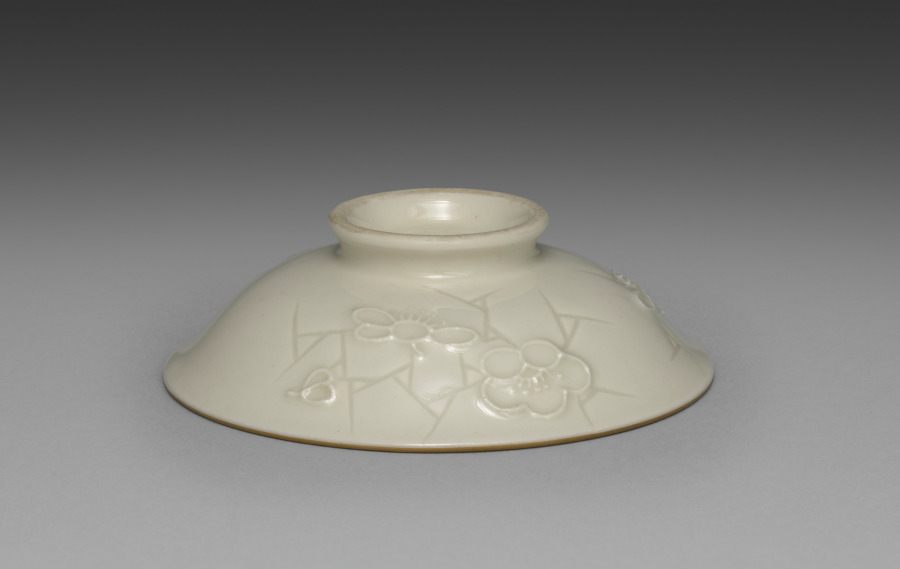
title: Cover for a Bowl from Dining Set with Plum Blossoms and Cracked-Ice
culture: Japan, Meiji period (1868–1912)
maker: Seifū Yohei II (Japanese, 1844–1878)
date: c. 1875–78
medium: Porcelain with molded designs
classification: Ceramic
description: Each item in this set has a delicate low-relief design of flowering plum branches over scattered, intersecting lines meant to resemble the cracked-ice surface of a frozen body of water and is signed on the base in gold pigment. While Yohei II produced many fine works in underglaze blue, like those produced by Kiyomizu Shichibei, he also made works in quite different styles later in his career, from the early 1870 s. In 1873, he was appointed purveyor to the Industrial Center of Kyoto Prefecture, a designation associated with Kyoto’s efforts to reach an international market through the port of Kobe; and from 1875 until his death, he was involved in national-level projects to present Japanese ceramics across the world. It was during this period that Yohei III was apprenticed to Yohei II, and it has been suggested that this set may in fact be an early example of Yohei III’s work, which he signed with his teacher’s name. Decorated with flowers resembling Japanese textile motifs, the set calls to mind the design of Yohei II’s pair of vases with plum blossoms in the Victoria and Albert Museum. Here, the elaborate trees created for a formal public exhibition setting have been translated into the approachable blossoms of the genteel domestic environment. While the designs are consistent across the pieces, each raised flower petal and pistil and each incised line in the ice was done by hand, so the cups, bowls, and dishes are similar yet unique. The bottoms of two boxes once identified the set’s owner, but the information has been deliberately obscured with black ink. However, inscriptions still visible appear to indicate two occasions, once at the end of July 1886 , and once again in June 1916 , when parts of the set were requested from Hokura in Niigata Prefecture. The location corresponds to a neighborhood in the present-day city of Jōetsu. The surname Tsuji 辻 also appears on a paper tag affixed to one of the box cloths. Future research may possibly reveal more about their provenance. A vase by Yohei III in a private collection combines the formal grandeur of the Yohei II vases in the Victoria and Albert Museum with the gentler design of this dining set, placing flowering plum trees against soft, scalloped-edge clouds resembling those in golden screens.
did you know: The dining wares have a creamy white coloration that the four boxes containing them identify as Korean in style.